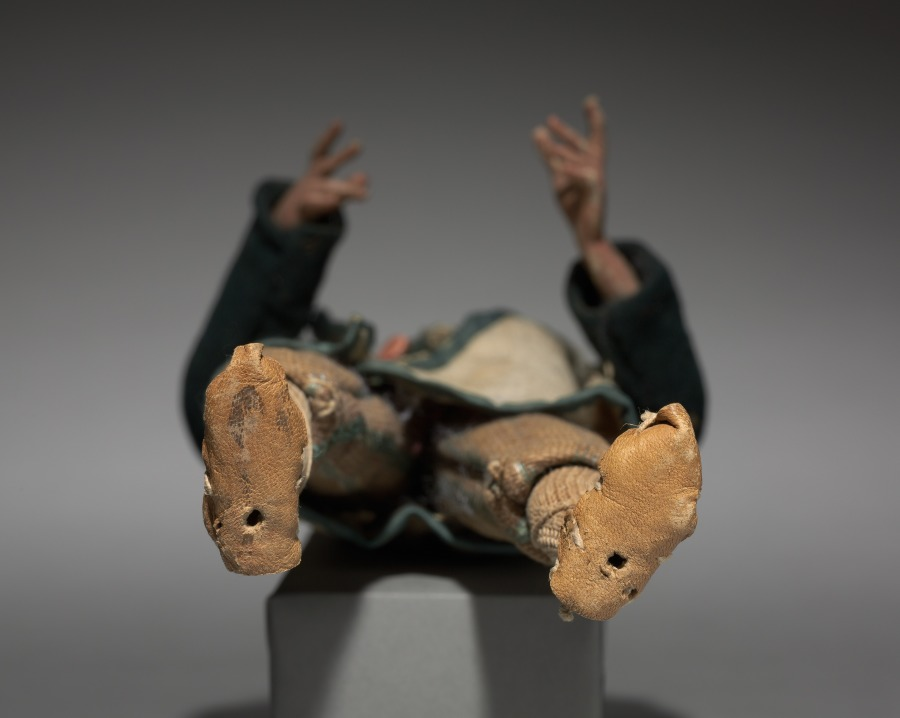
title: Figure from a Crèche: Piper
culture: Italy, Naples, late 18th-early 19th century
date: 1780–1830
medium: painted wood and terracotta with various textiles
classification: Sculpture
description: The practice of creating scenes of the Nativity for the home dates from the early 1700s in Italy, where people began to set up doll-like figures of about a foot or less in height. The custom was particularly popular in Naples around 1800, where crèche scenes (crèche means cradle, or crib) included many figures, whose heads and hands of painted terracotta, stuffed cloth bodies, and clothing adapted from contemporary local costumes gave them an amazingly realistic character. Representations of the birth of Jesus can be traced to the first few centuries of Christianity. Both living creatures and sculptural depictions of them were used from early times. By the late middle ages it was customary to create life-size figures of wood or stone, naturalistically painted, to represent the characters who participated in the events of Jesus's early life. These sculptures were then arranged in scenes illustrating one or both of the most important of these events, the Adoration of the Shepherds and the Adoration of the Magi-the three kings from the East who came to pay homage to the Christ child. Used in churches, these large figures were especially popular in Italy, Central Europe, Spain, and Portugal.